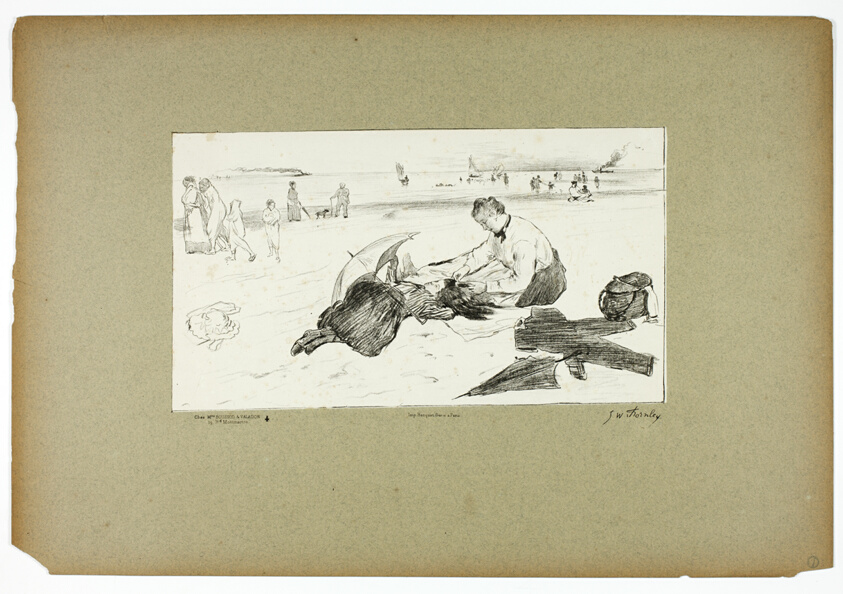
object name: Print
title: On the Beach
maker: Georges-William Thornley (French, 1857-1935); after Edgar Degas (French, 1834-1917); printed by Atelier Becquet (French, 19th century); published by Boussod, Valadon, & Company (French, 18th-19th century)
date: 1889–90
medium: Lithograph in black on paper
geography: France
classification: lithograph; print; prints and drawing